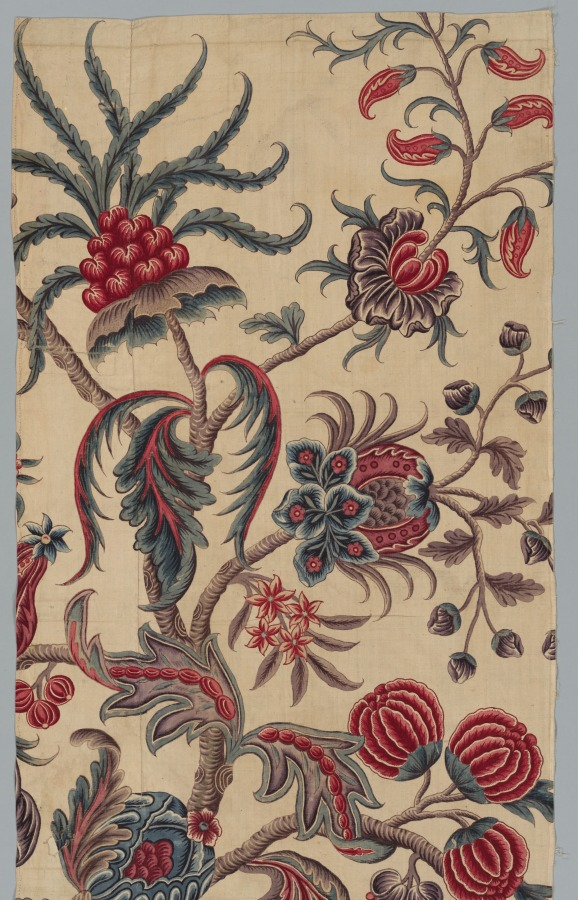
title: Strip of Woodblock Printed Linen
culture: France, late 18th century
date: c. 1785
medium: woodblock print on linen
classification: Textile